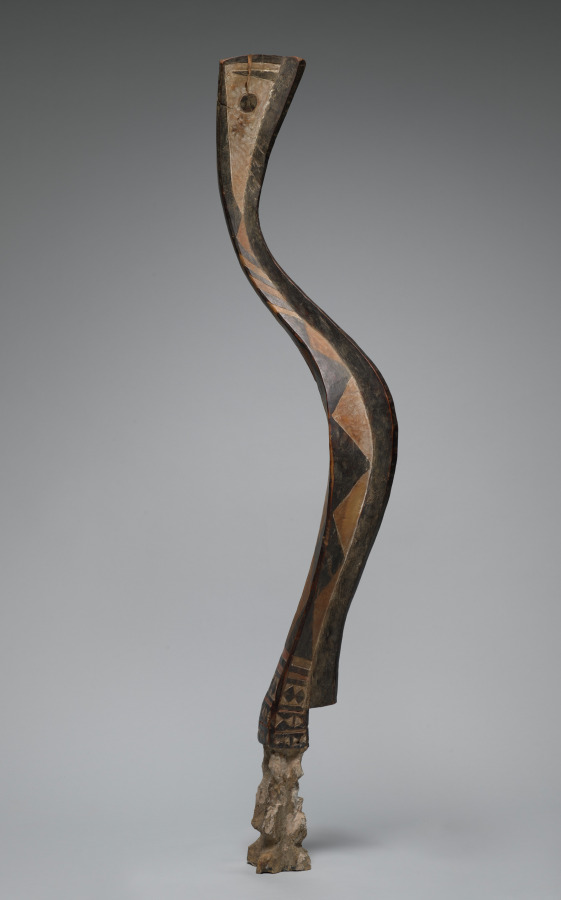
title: Serpent Headdress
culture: Africa, West Africa, Guinea, possibly Baga-style maker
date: late 1800s–early 1900s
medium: Wood (Nauclea pobeguinii) and paint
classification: Mask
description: Traditionally, Baga society was ruled by village councils of elders who derived their power from their direct contact with spirit entities through lifelong initiation rituals and the accumulation of secret knowledge. Two different religious orders controlled initiations, providing the context for much Baga art. One was identified as female, the other as male, though only men belonged to both groups. Initiations in each order followed three stages, culminating in the revelation of the highest spirit being. This type of Baga headdress embodied the serpent spirit Ninkinanka, honored for giving rain, bestowing riches, and bringing forth children. The serpent figure would be placed on top of a conical framework of palm branches carried on a male dancer’s head. It appeared at the end of the first level of the initiation for boys and girls or just before the circumcision at the beginning of the boys’ initiation.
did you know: In the context of boys' initiations, the serpent headdress was sometimes identified as the rainbow, which the Baga and their neighbors associate with beginnings and endings, life and death, and the continuation of lineages.